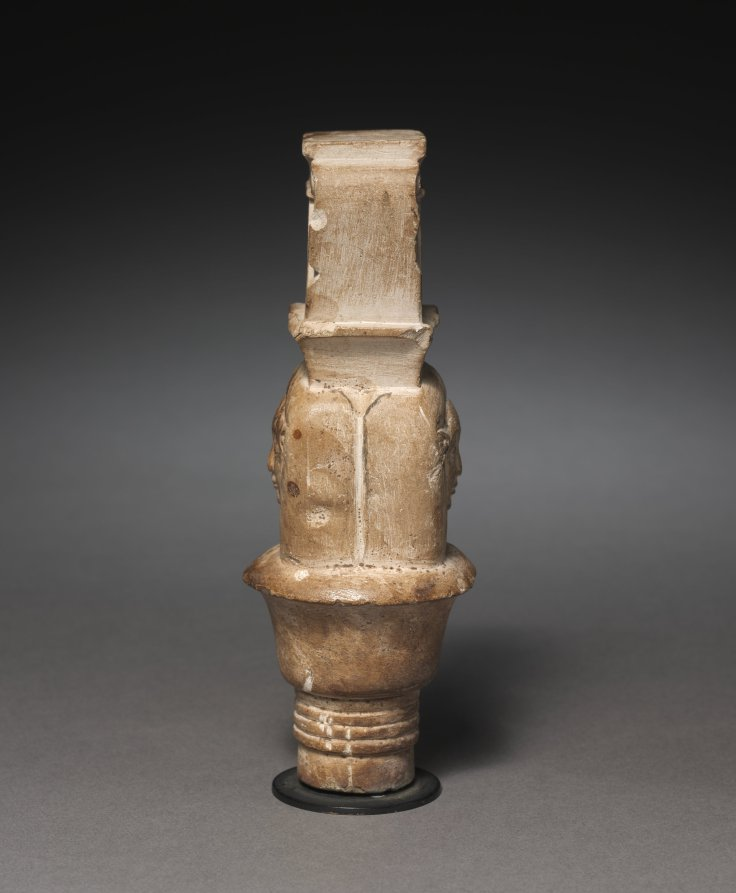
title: Votive Hathor Column Capital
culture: Egypt, Late period (715–332 BCE), Dynasty 30–Greco-Roman period (332 BCE–395 CE), Ptolemaic dynasty (305–30 BCE)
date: 380–30 BCE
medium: limestone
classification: Sculpture